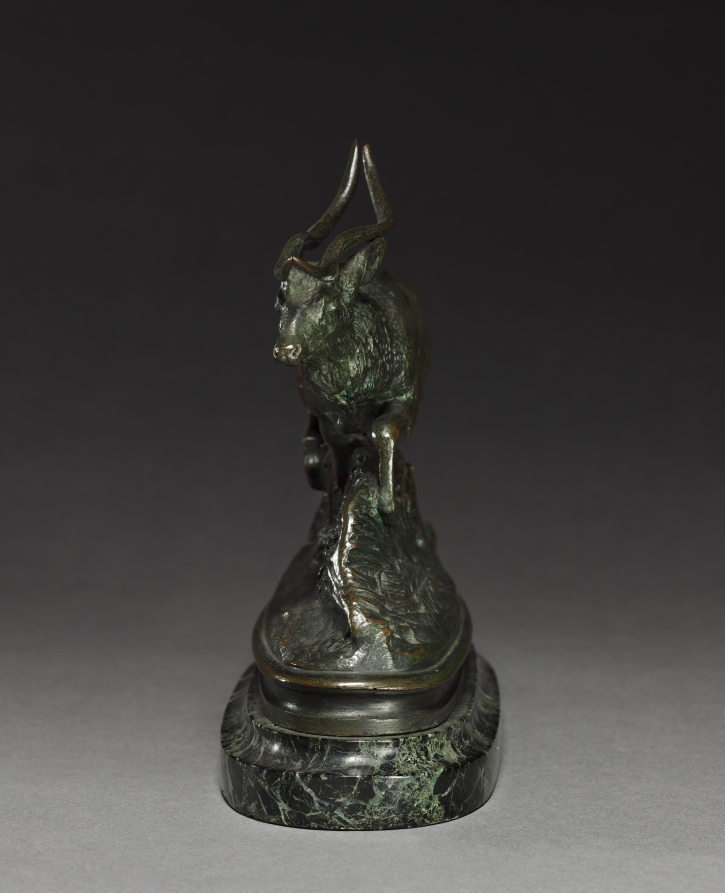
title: Axis Deer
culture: France, 19th century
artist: Antoine-Louis Barye (French, 1796–1875)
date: 19th century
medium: bronze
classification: Sculpture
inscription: Signed: "Barye"; faintly inscribed in small letters: "BARYE 21"